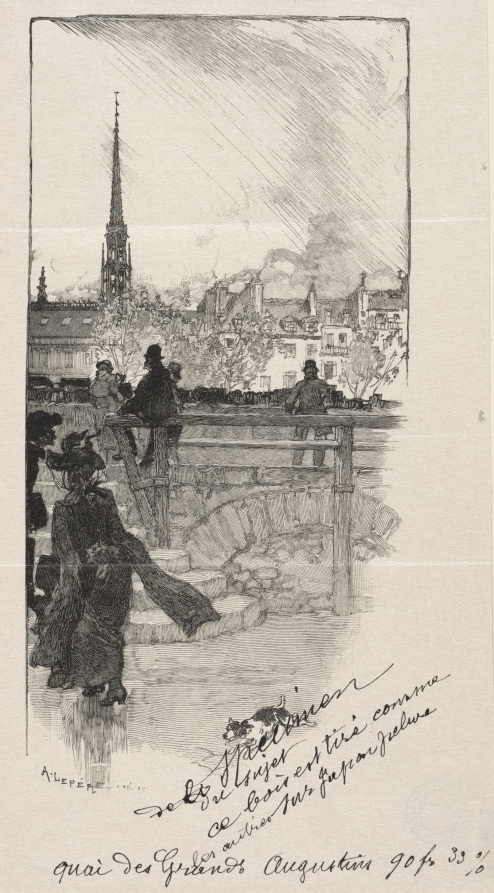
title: Quai des Grands Augustins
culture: France, 19th-20th century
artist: Auguste Louis Lepère (French, 1849–1918)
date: 1886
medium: wood engraving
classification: Print